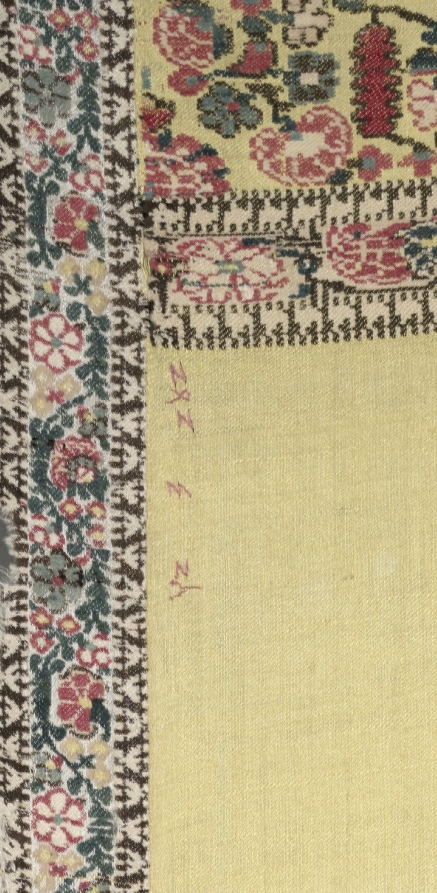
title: Long Shawl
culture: France?, 19th century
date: before 1815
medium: 2/2 twill weave ground with supplementary weft pattern in 3/1 (Z) weave twill; silk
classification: Textile